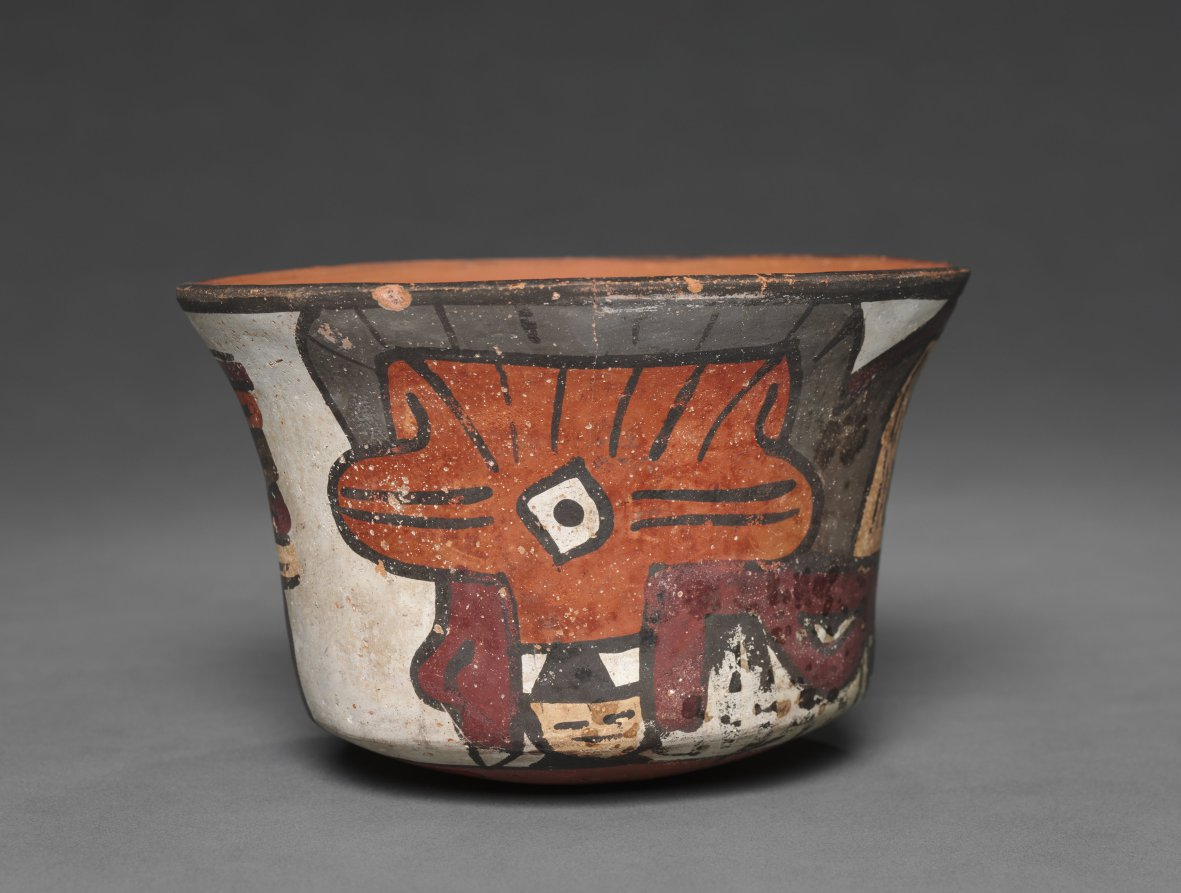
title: Bowl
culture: Peru, South Coast, Nasca, Florescent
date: 100 BCE–700 CE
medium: earthenware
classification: Ceramic